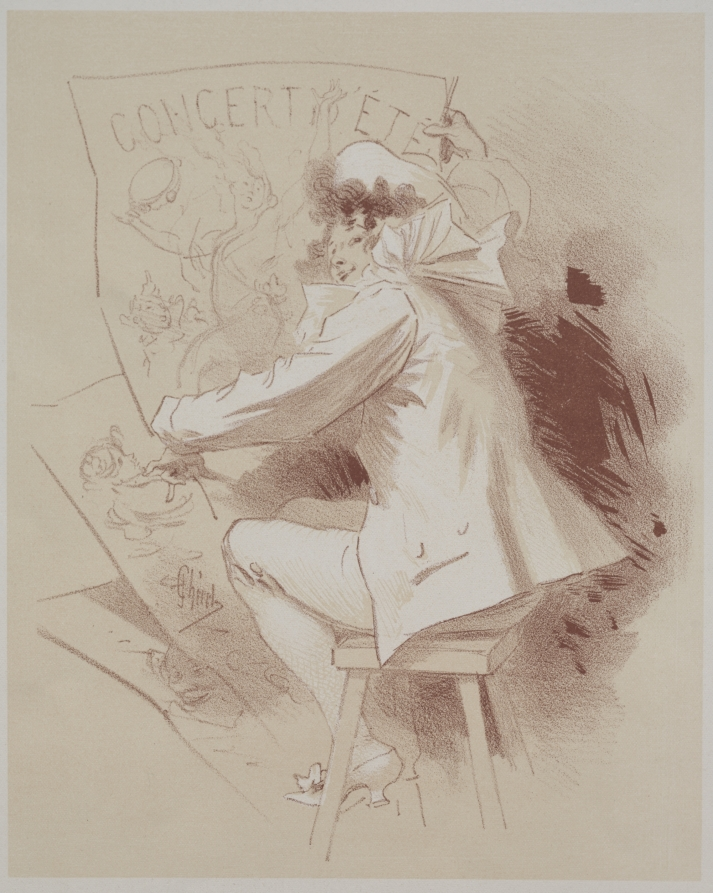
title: Summer Concert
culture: France, 19th century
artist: Jules Chéret (French, 1836–1932)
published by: Chaix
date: c. 1895–1900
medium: lithograph printed in colors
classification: Print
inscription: lower left, printed (in sanguine): "Imprimerie Chaix (Encres Lorilleux)/"; lower right, printed (in sanguine): Les Maitres de l'Affiche"